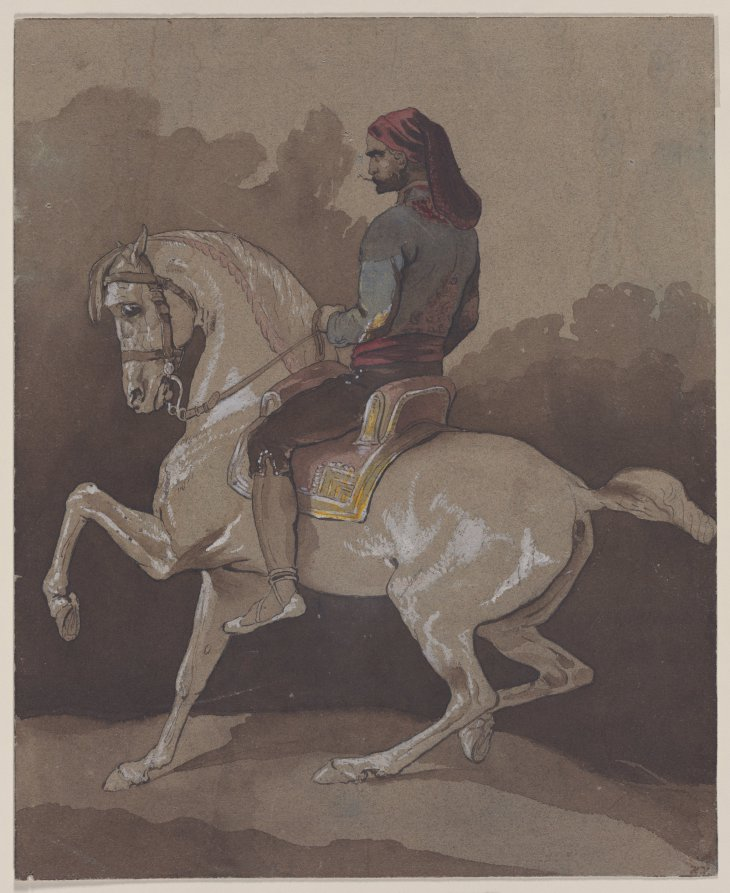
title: Arab on Horseback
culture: France, 19th century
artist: Horace Vernet (French, 1789–1863)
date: 1800s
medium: watercolor heightened with white gouache with graphite underdrawing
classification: Drawing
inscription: Inscribed, lower right, in brown ink: H.V.